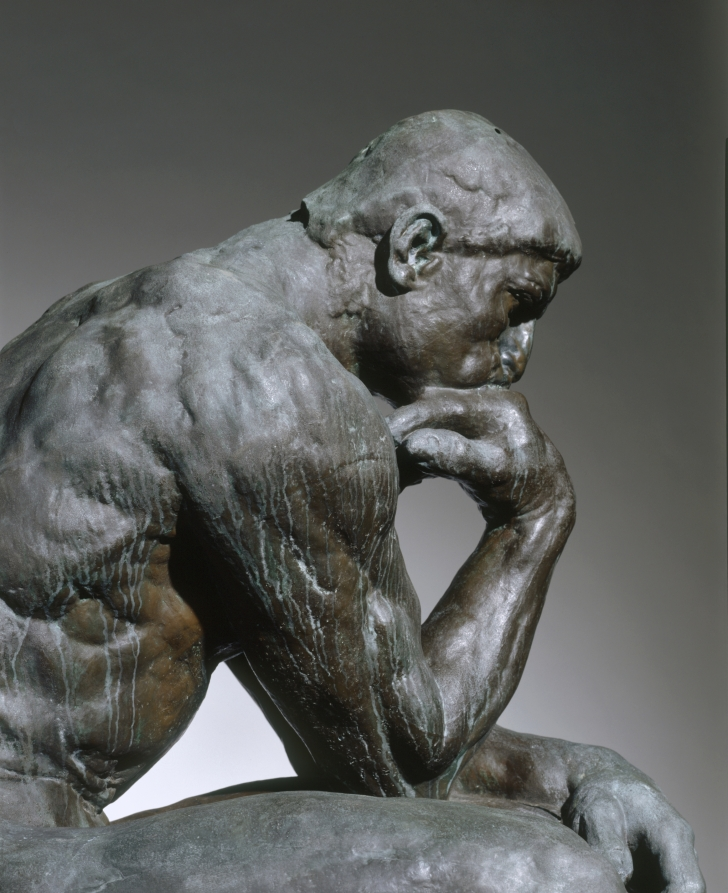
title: The Thinker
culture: France, 19th century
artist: Auguste Rodin (French, 1840–1917)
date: 1880–81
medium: bronze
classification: Sculpture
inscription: signed on base near sinister foot: "A. Rodin."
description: The Thinker was first developed as part of Rodin's The Gates of Hell, a sculptured doorway for a proposed museum of decorative arts in Paris. Intended to be part of a relief directly above the doors, the rugged figure was originally conceived as a generalized image of the Italian poet Dante Alighieri (1265–1321), who wrote the Divine Comedy.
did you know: This enlarged version of The Thinker is one of less than 10 cast during Rodin's lifetime.